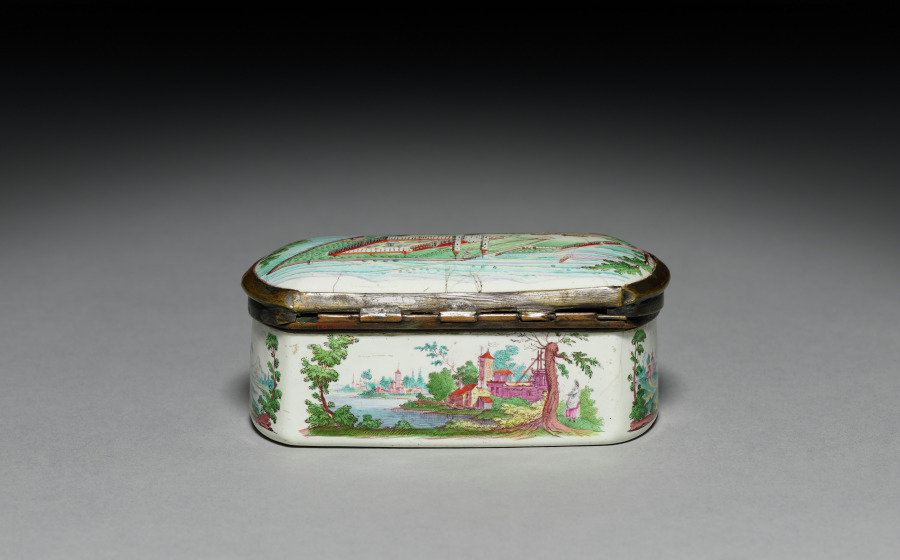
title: Snuff Box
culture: Austria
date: mid-1700s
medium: enamel on copper with metal mounts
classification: Miscellaneous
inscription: on interior of lid in a rococo cartouche: "S Hieronimus."